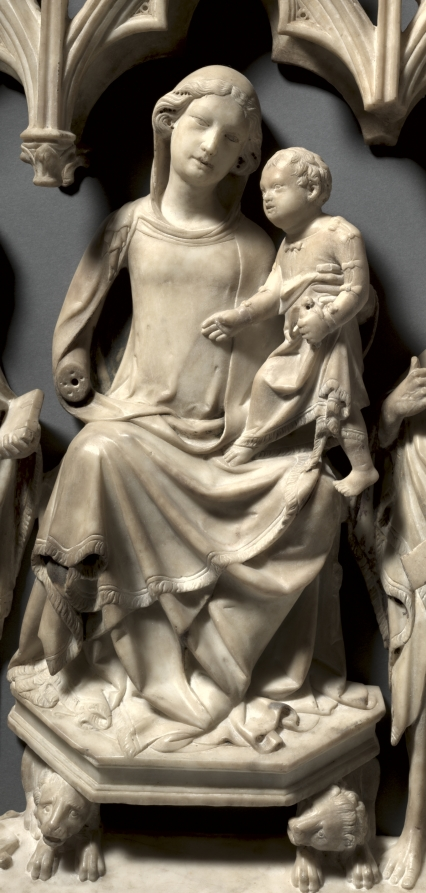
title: Madonna and Child with Saints Catherine and John the Baptist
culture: Italy, Siena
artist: Giovanni di Agostino (Italian, c. 1310–1370)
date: c. 1340–50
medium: marble with traces of polychromy and gilding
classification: Sculpture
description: The Madonna is seated beneath a Gothic-arched canopy flanked by Saints Catherine and John the Baptist. A rectangular frame encloses the group. Most likely from a Sienese church interior, the work is probably a fragment of a larger sculptural program such as a tomb. An authentic Gothic style in sculpture appeared in Tuscany from the mid 1200s through about 1350 elucidated by the work of Giovanni di Agostino, Nicola and Giovanni Pisano, and others who were active on Siena Cathedral’s sculptural program. Agostino’s work suggests an awareness of Gothic sculpture and the decorative arts in France from which he borrowed freely. This relief was probably completed just before the plague of 1348, an event which altered the degree and character of Sienese art.